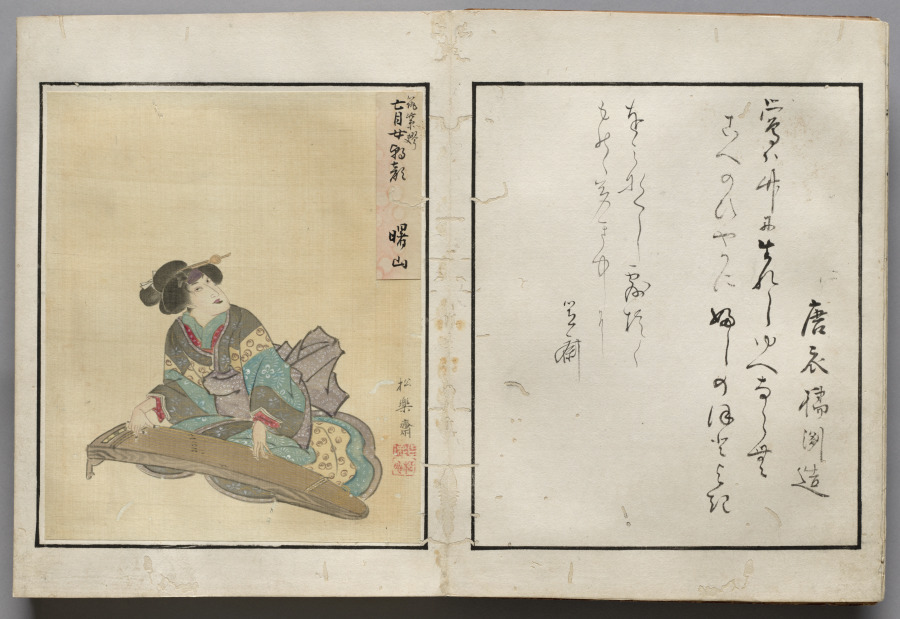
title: Double-Leaf from Album of Actor Portraits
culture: Japan, Edo period (1615–1868)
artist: Shōrakusai (Japanese)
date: c. 1790–1810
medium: double-leaf from an accordion-style album; ink on paper (left) and ink and color on silk (left)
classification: Bound Volume